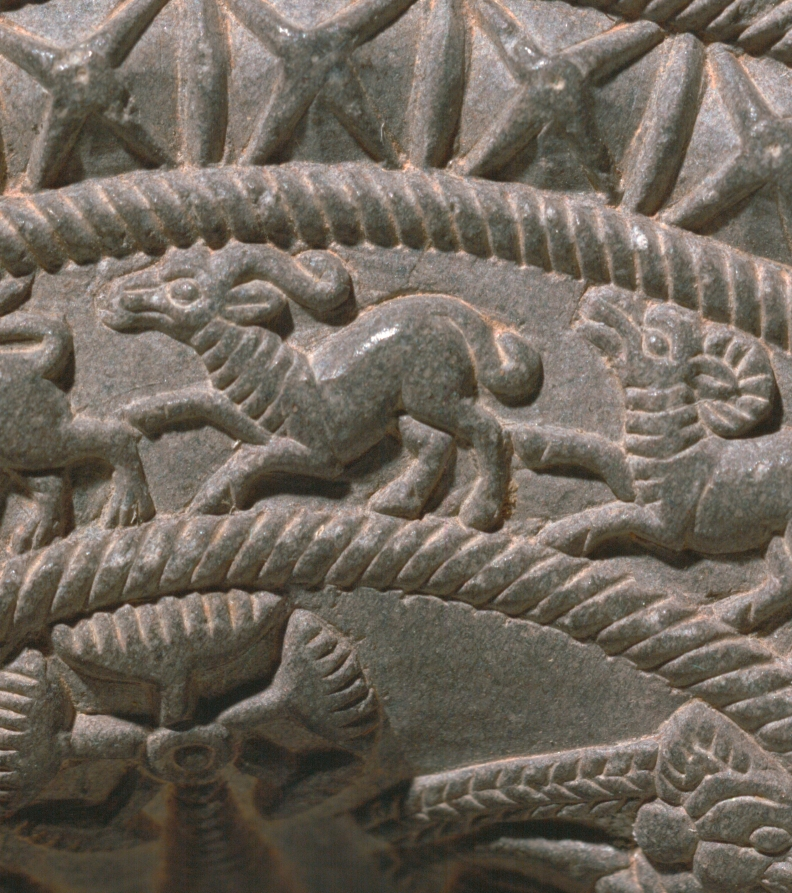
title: Ringstone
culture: India, Maurya period (322–185 BCE)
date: 200s BCE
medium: steatite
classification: Sculpture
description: Ringstones are among the earliest works of art to be created in stone during India's historical period. This example is finely carved with detailed images of affectionate couples and palm trees, running animals, and geometric motifs in concentric circles. The function of ringstones remains uncertain, since none of the surviving examples is inscribed or explained in a text.